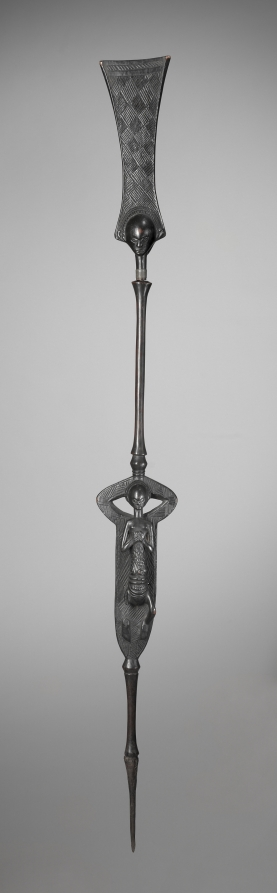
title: Staff of Office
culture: Central Africa, Democratic Republic of the Congo, Luba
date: early to mid-1800s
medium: Wood and iron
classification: Sculpture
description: Sanctified by a ritual specialist and enhanced with medicinal substances, the staff possessed supernatural qualities and was endowed with healing power. Luba staffs are among the most important regalia of Luba kings. The metal point alludes to the kingdom's stability and durability. Each staff has its own distinctive iconography to reflect regional styles. As Chief Msidi (former owner of this staff) ruled over the Yeke kingdom (and not the Luba kingdom), it begs the question of how he acquired this symbol of another realm's power.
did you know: The Yeke kingdom ruler Chief Msidi gave this as a gift of appreciation to the British missionary Frederick Stanley Arnot, whom the chief had invited to his kingdom.